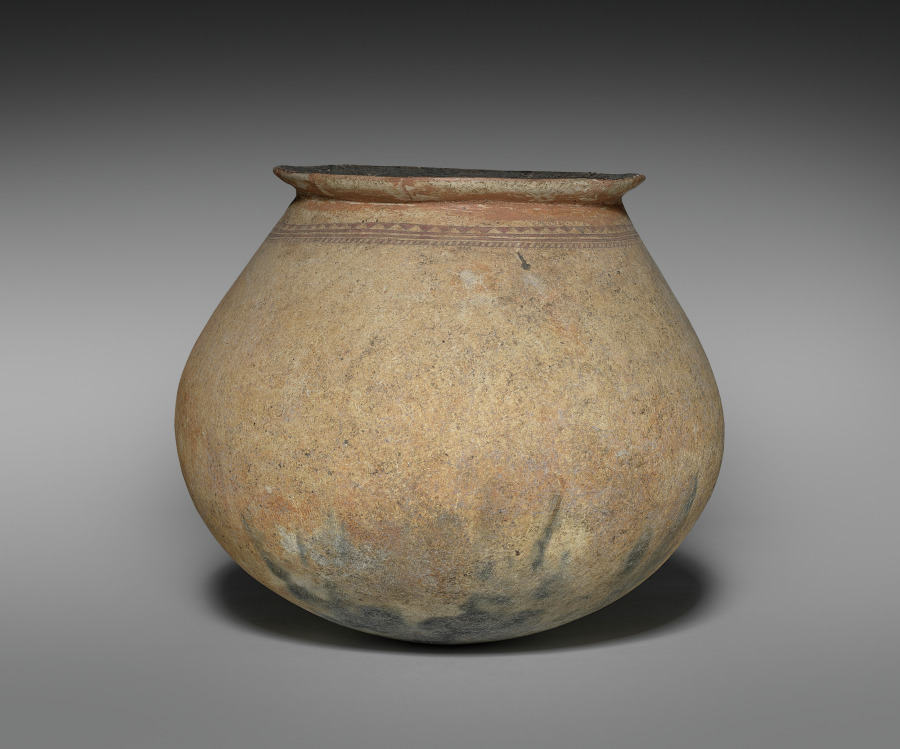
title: Jar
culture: Thailand, Ban Chiang, Neolithic Period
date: 3000s BCE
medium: reddish earthenware with painted decoration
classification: Ceramic